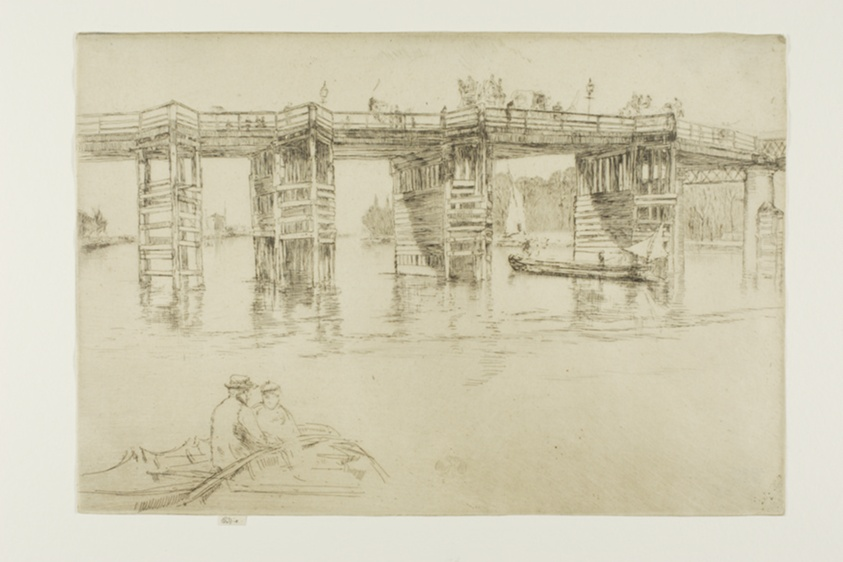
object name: Print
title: Old Putney Bridge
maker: James McNeill Whistler (American, 1834-1903)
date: 1879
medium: Etching and drypoint with foul biting in dark brown ink on cream laid paper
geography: United States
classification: etching; drypoint; foul biting; print; prints and drawing; paper